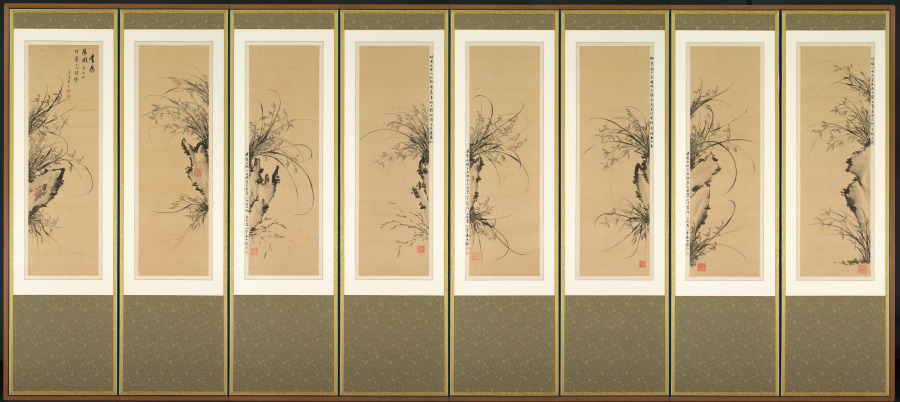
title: Orchids and Rocks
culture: Korea, Joseon dynasty (1392–1910)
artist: Yi Ha-eung (Korean, 1820–1898)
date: 1897–98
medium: Eight-panel folding screen; ink on silk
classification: Painting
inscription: Translation: [I] painted for the high minister Yangwon. [I] humbly request your corrections and advice [on my painting]. [By] an eighty-year old gentleman of rocks.)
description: Yi Ha-eung (1820−1898), the artist of this eight-panel folding screen, was one of the most influential men in late 19th-century Korea. Acting as the regent for his son, King Gojong (1852−1919), who ascended the throne at the age of thirteen, Yi ruled Korea from 1866 to 1873. In addition to his illustrious political career, Yi was also recognized as one of the most celebrated artists who led the revival of literati art in late 19th-century Korean art. In particular, he was recognized as the master of orchids, one of the “Four Gentlemen” (plum, orchid, chrysanthemum, and bamboo) themes. Solely relying on monochrome ink, Yi depicted the curvilinear silhouettes of cymbidium orchid leaves dramatically hanging down from cliffs. Growing in wilderness and redolent with fragrance, orchids were often associated with the perseverance of principled gentlemen, and thus became one of the most popular subjects of scholar-artists' paintings.On the upper right corner of the far left panel, Yi wrote a short inscription stating that he painted the work at the age of 80.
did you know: The artist of this elegant painting is the formidable politician Yi Ha-eung (1820–1898), who is known for a seclusion policy that aimed to protect Korea and its sovereignty from foreign influences.